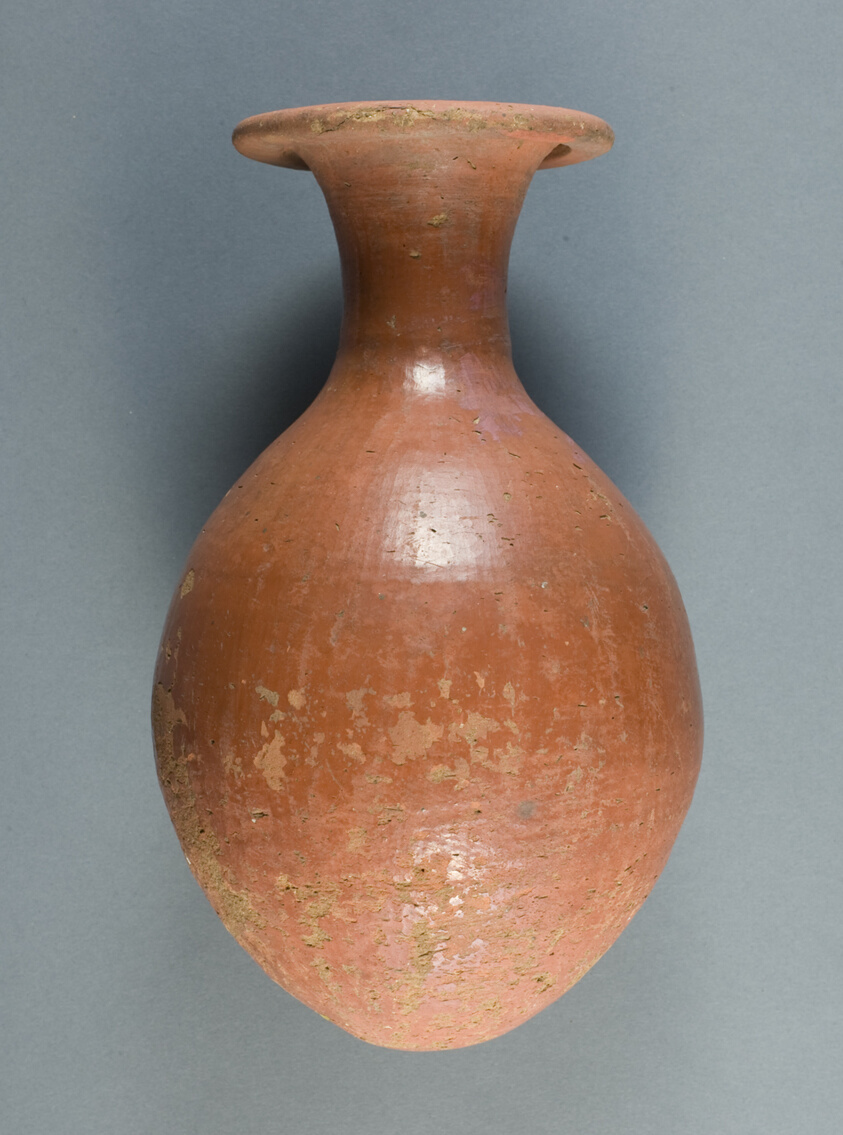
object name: Vessel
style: egyptian, ancient, eighteenth dynasty, new kingdom, second intermediate period, seventeenth dynasty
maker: Egyptian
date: Late Second Intermediate Period–early New Kingdom, Dynasty 17–18, about 1600–1425 BCE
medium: Ceramic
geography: Egypt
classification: vessel; ceramics; ancient art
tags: containers, vessels